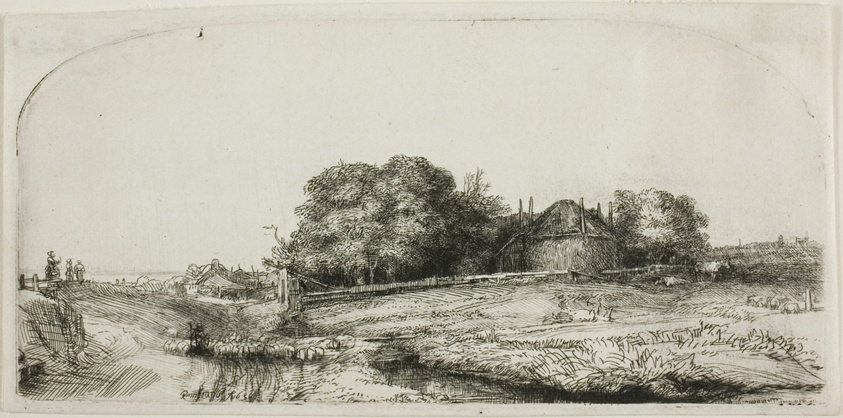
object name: Print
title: Cottages and a Hay Barn on the Diemerdijk with a Flock of Sheep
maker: Rembrandt van Rijn (Dutch, 1606-1669)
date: 1650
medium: Etching and drypoint on ivory paper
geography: Holland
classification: etching; print; prints and drawing; paper; drypoint